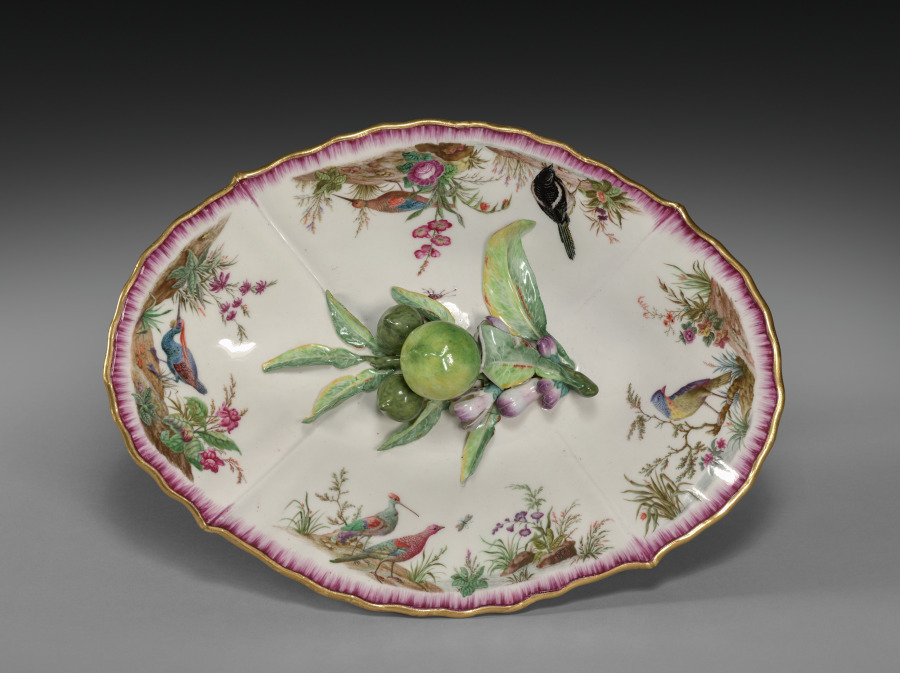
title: Cover for a Tureen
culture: France, Vincennes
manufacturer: Vincennes Porcelain Factory (France, 1740–56)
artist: probably painted by Louis-Denis Armand (French, active c. 1745–1783)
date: c. 1752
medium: soft-paste porcelain wth enamel and gilt decoraion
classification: Ceramic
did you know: This object was manufactured in soft-paste porcelain, a material used by many European porcelain factories before they were able to emulate the hard-paste porcelain of China and Japan.